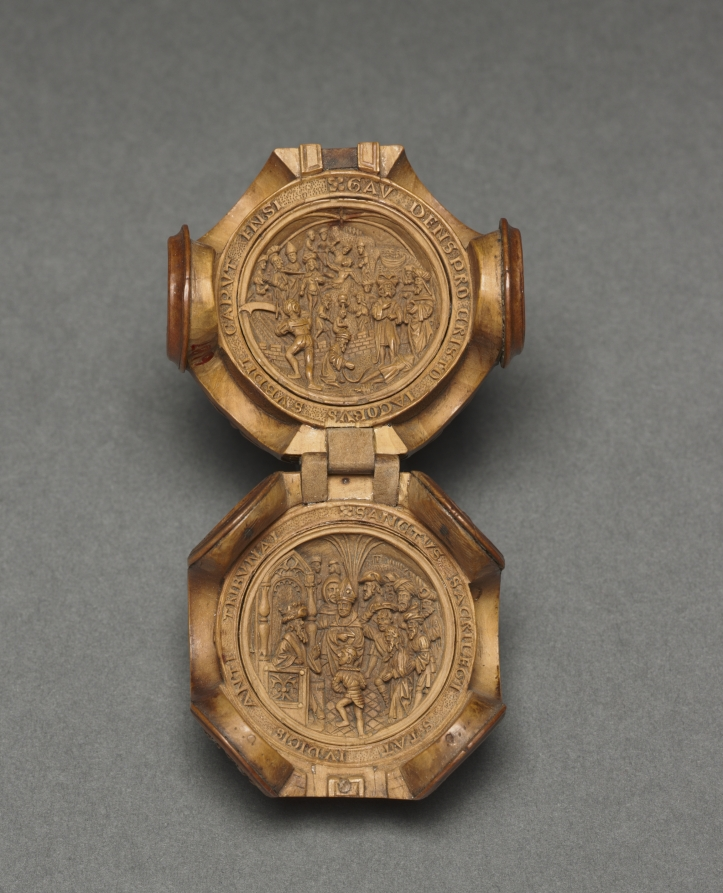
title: Prayer Nut with Scenes from the Life of St. James the Greater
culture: Northern Netherlands (Holland)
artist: Adam Dircksz (Netherlandish, active c. 1500)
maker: and Workshop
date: c. 1500–1530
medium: boxwood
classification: Sculpture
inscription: Interior around lower half: SANCTVS SACRILEGI STAT IVDICIS ANTE TRIBVNAL (Holiness stands before the throne of the profane judge)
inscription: Interior, around upper half: GAVDENS PRO CRISTO IACOBVS SVBDIT CAPVT ENSI (St James submits his head to the sword)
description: Prayer nuts are capsules that can be opened in half and were mainly worn from the end of the 1400s until 1530, particularly in the Netherlands. These objects are generally made from boxwood and carved with extreme refinement and delicacy. They often echo Gothic architecture and include openwork tracery or elaborate decorative patterns. Prayer nuts came into fashion for private devotion as a pendant on the rosary or on a decorative chain. The emergence of prayer nuts went hand in hand with the practice of praying the rosary more frequently at the end of the Middle Ages.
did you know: This miniature masterpiece was held and caressed within the palm of the holder as they prayed and meditated on their faith. What do you use to focus or engage in quiet concentration?